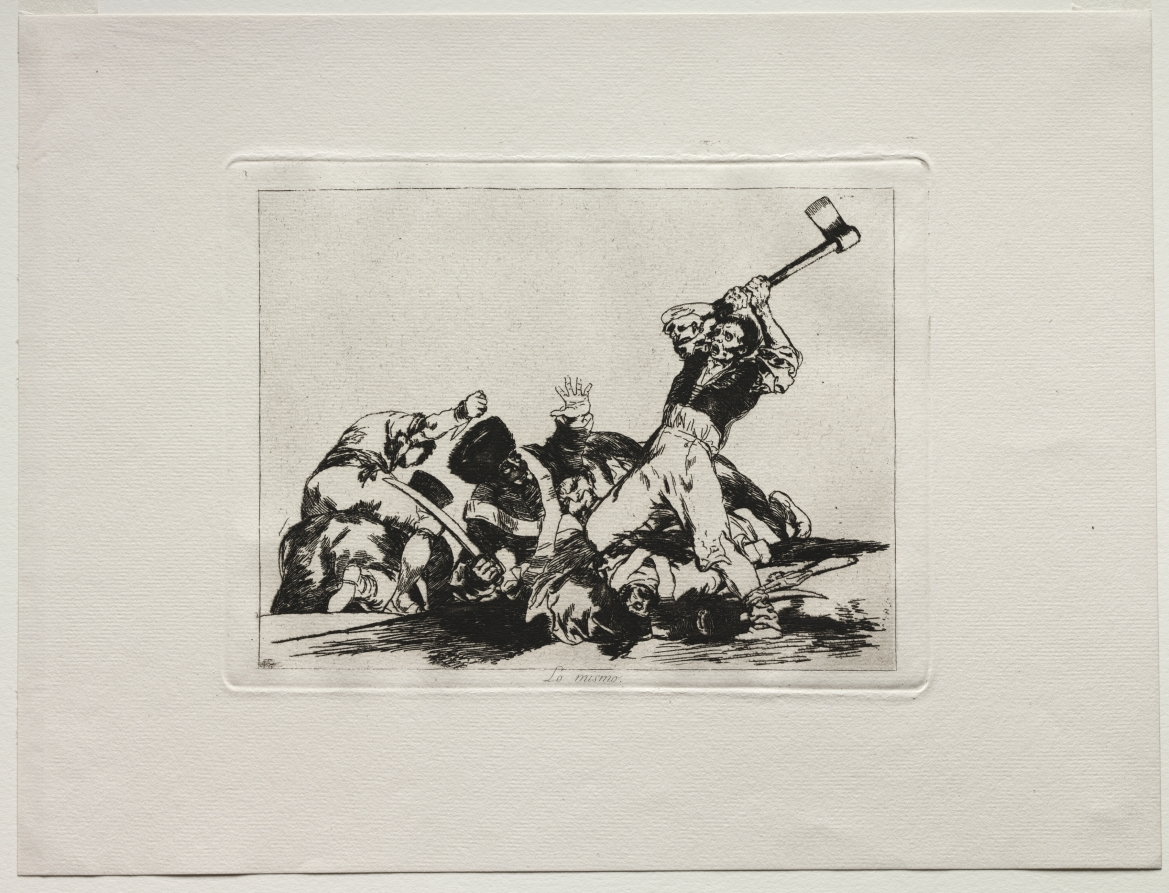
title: The Horrors of War: The Same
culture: Spain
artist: Francisco de Goya (Spanish, 1746–1828)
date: c. 1810–20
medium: etching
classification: Print